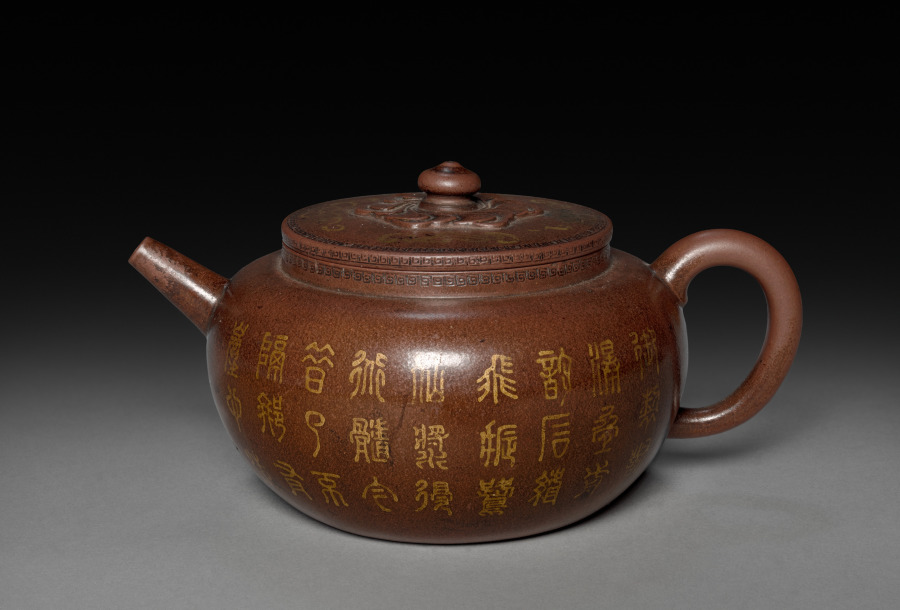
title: Teapot with Landscape and Imperial Poem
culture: China, Jiangsu province, Yixing, Qing dynasty (1644–1911), Qianlong reign (1736–95)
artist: Chen Hanwen (Chinese, active c. 1720s–90s)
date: 1762–95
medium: Stoneware, with gold pigment, Yixing ware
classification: Ceramic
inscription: 陳漢文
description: This teapot with a polished surface shows an imperial poem in gold on one side and a landscape on the other. The poem in archaic seal script was composed by the Qianlong emperor on his third southern inspection tour in 1762, when he traveled to southern China to solidify his rule. The base bears a stamped seal of its maker. Yixing potters produced teapots primarily for Ming dynasty literati-officials who valued simplicity and restraint, until the early Qing emperors introduced them at court.